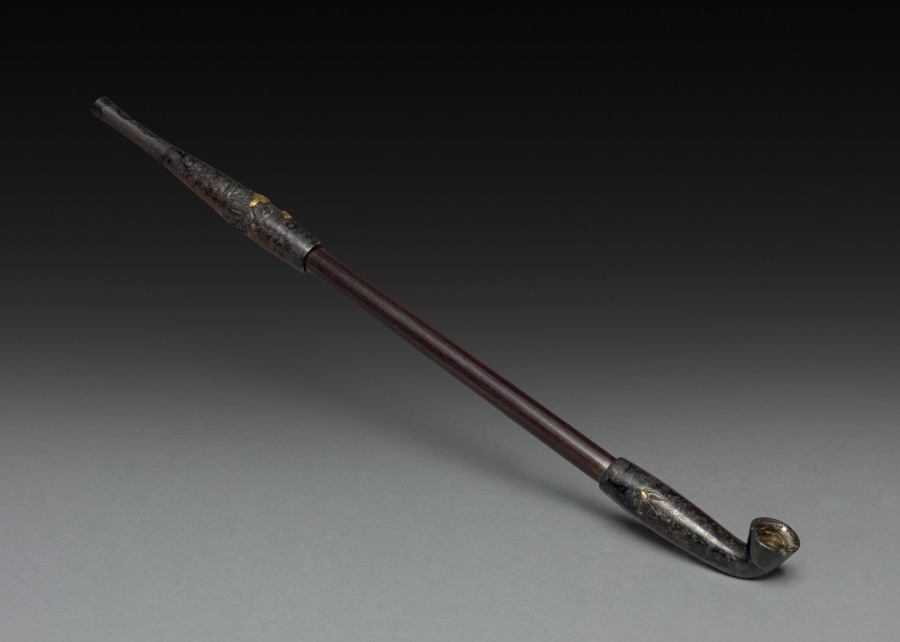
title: Tobacco Pipe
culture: Japan, Edo period (1615–1868) to Meiji period (1868–1912)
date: 1800s–early 1900s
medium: wood and silver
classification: Miscellaneous